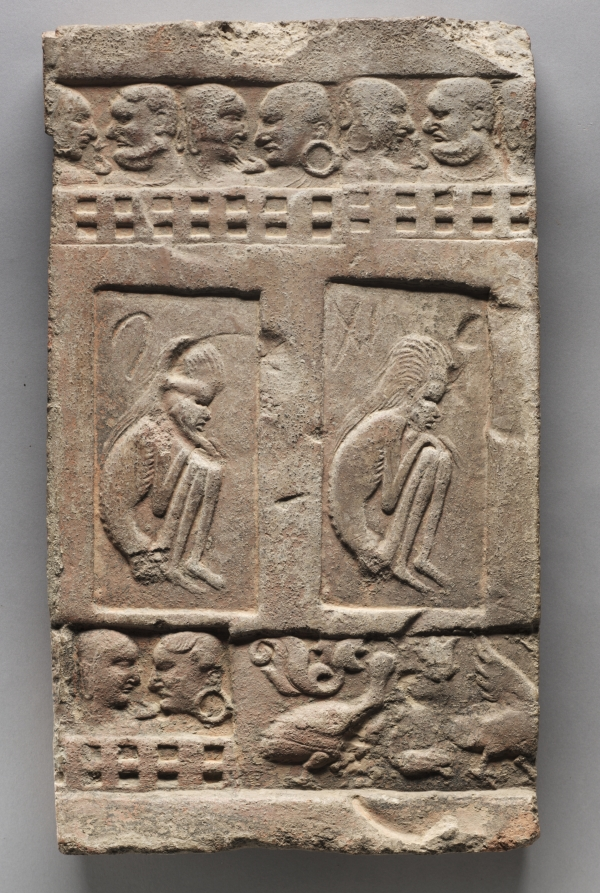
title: Seated Ascetics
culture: India, Kashmir, Harwan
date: 300s CE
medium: terracotta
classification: Sculpture